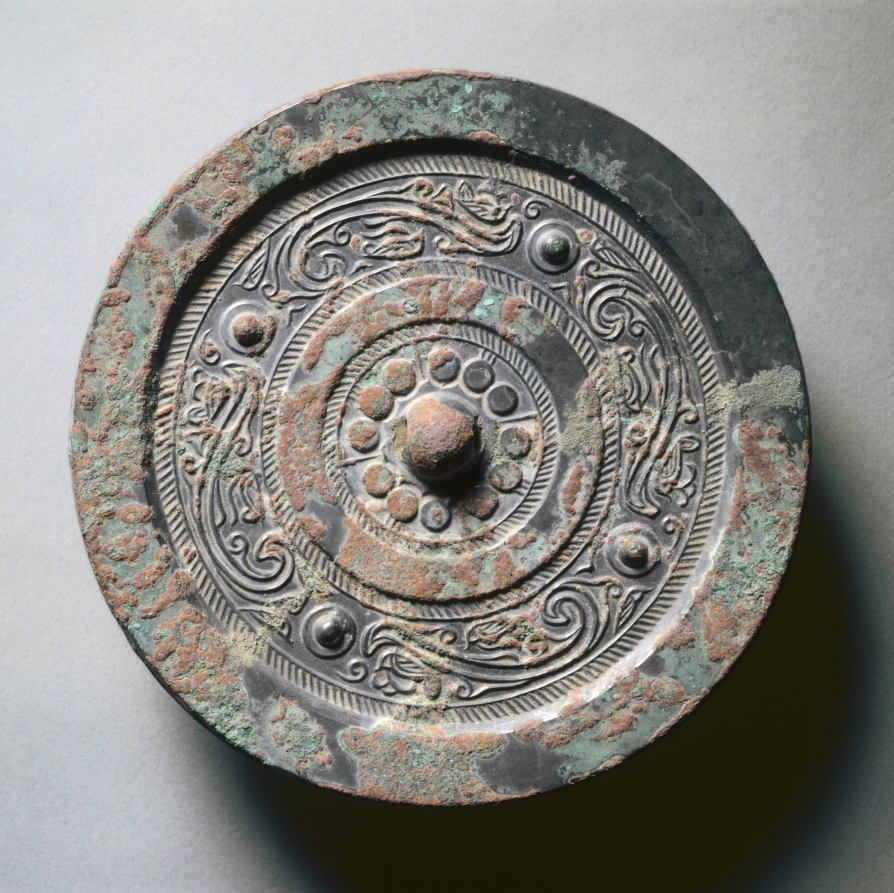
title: Mirror with Four Nipples, Quasi-Dragons, and Birds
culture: China, Western Han dynasty (206 BCE–8 CE)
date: late 300s BCE–50 CE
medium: bronze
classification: Metalwork